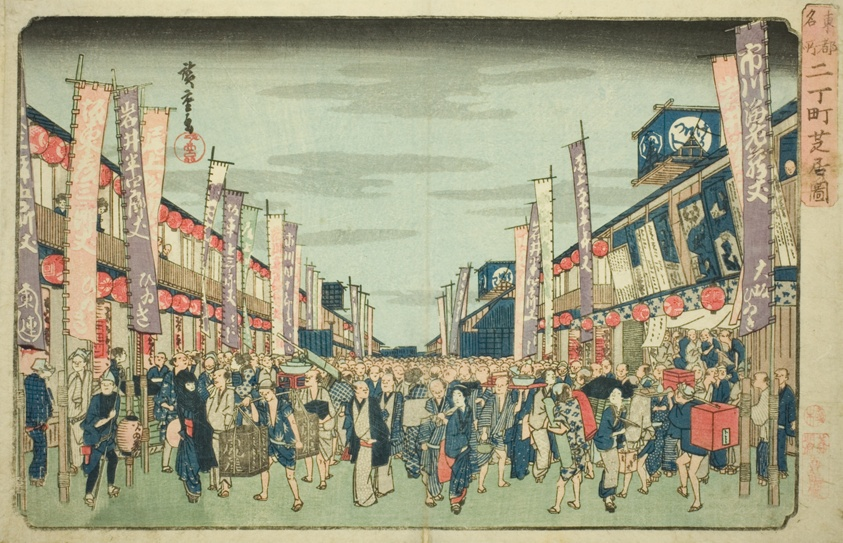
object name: Print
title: View of the Theaters in Nichomachi (Nichomachi shibai no zu), from the series "Famous Places in the Eastern Capital (Toto meisho)"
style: Japanese (culture or style)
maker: Utagawa Hiroshige 歌川 広重; Japanese, 1797-1858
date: c. 1832/38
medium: Color woodblock print; oban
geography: Japan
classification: woodblock print; print; asian art